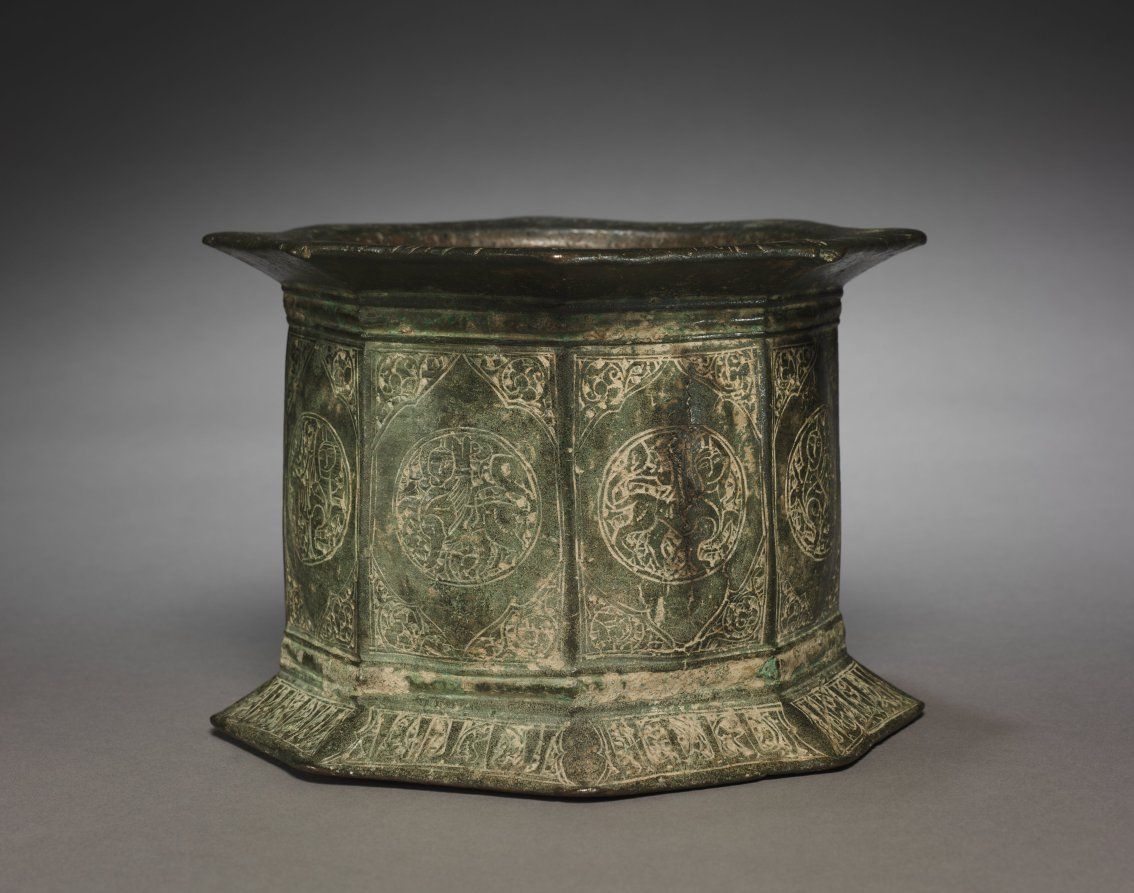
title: Mortar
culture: Iran, Seljuq period (1037–1194)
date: 1100s–1200s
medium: Cast bronze with incised decoration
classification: Metalwork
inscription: Thulth inscription on the Base, undeciphered